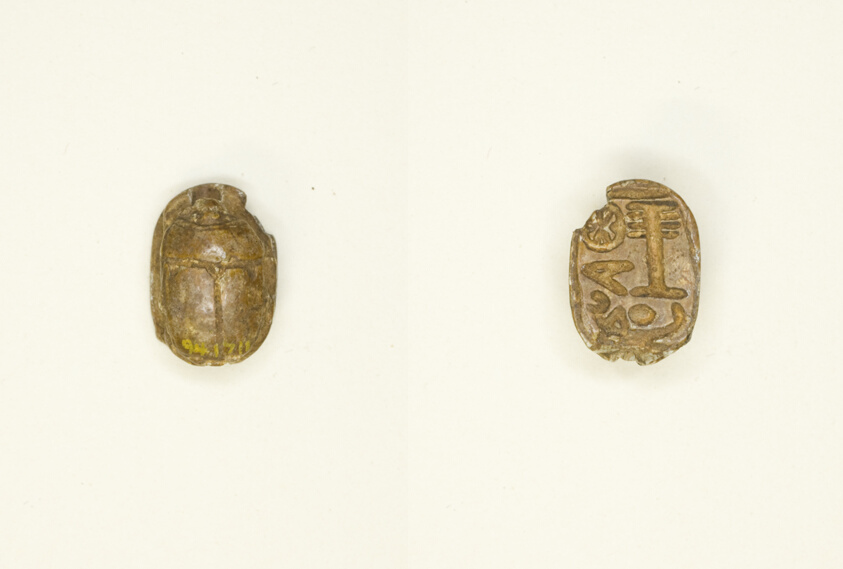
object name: Costume and Accessories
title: Scarab: Wish Formula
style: egyptian, ancient, late period (egyptian), new kingdom, third intermediate period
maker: Egyptian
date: New Kingdom–Late Period, Dynasties 18–26 (about 1550–525 BCE)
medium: Steatite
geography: Egypt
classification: scarab; ancient art; costume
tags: Hieroglyphs, boats, insects